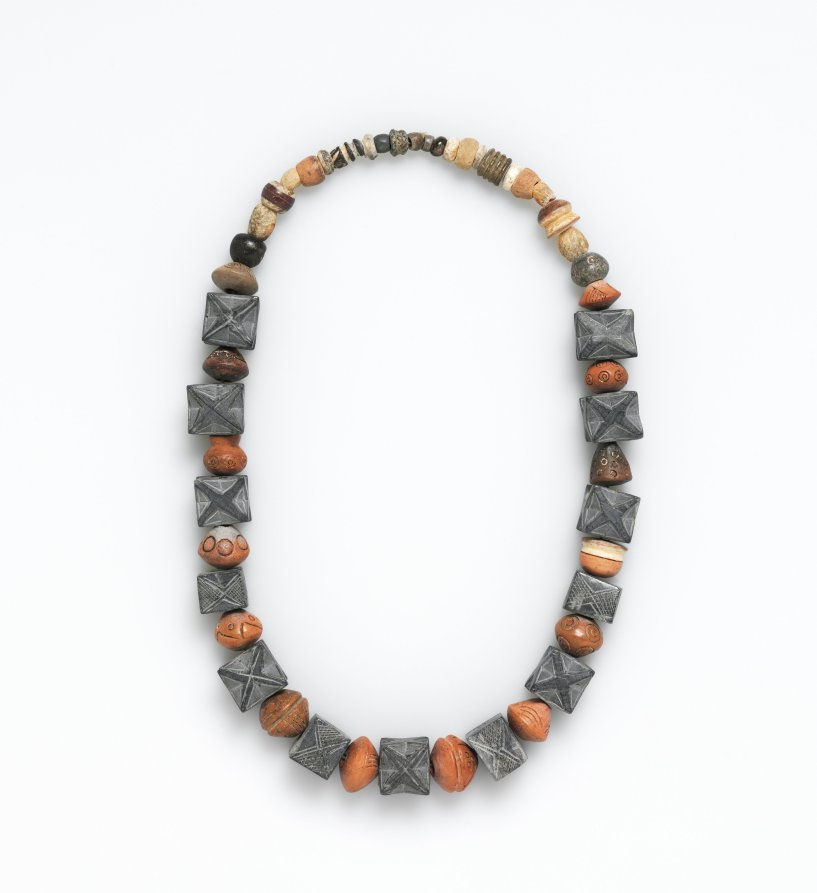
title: Necklace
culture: Peru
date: before 1532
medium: gray beads and wood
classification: Jewelry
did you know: These ancient beads were restrung in modern times.